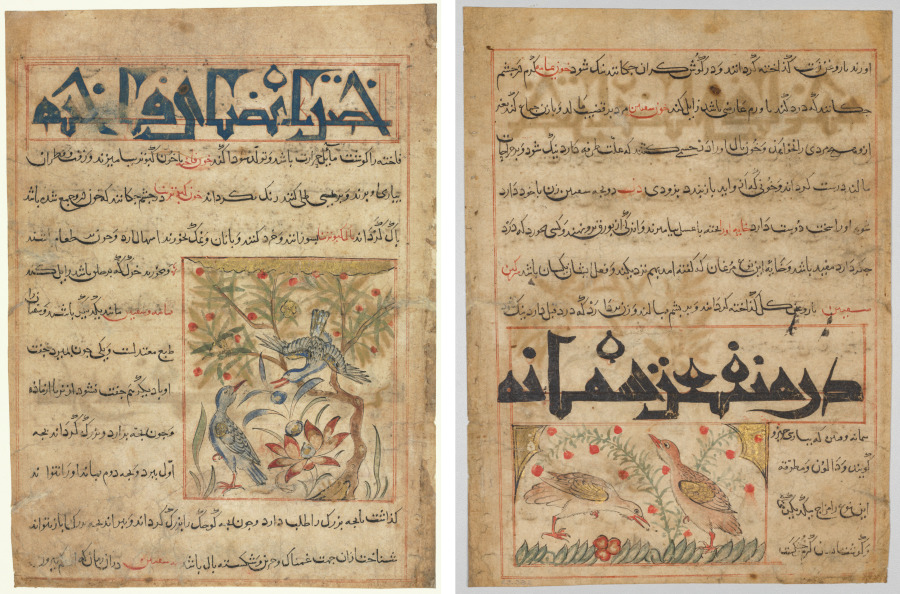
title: Qualities of Ringdoves (recto); On the Benefits of Quails (verso), from a Persian Manafi‘ al-Hayawan (The Benefits of Animals) of Abu Said Ubaid-Allah ibn Jibrail ibn Bakhtishu (died 1058–68)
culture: Iran, Maragah, Ilkhanid period (1256–1353)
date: c. 1300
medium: opaque watercolor, ink, and gold on paper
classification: Manuscript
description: This small illustration of ringdoves incorporates the influence of Chinese naturalism in the drawing of the tree trunk and lotus blossom. In contrast, the reverse side is more traditional. The innovative page layouts feature cursive nashki script with bold angular kufic script headings. Derived from Aristotelian sources, this treatise deals with the physical characteristics and organs of animals. The text was translated into Persian from Arabic for the Ilkhanid ruler Ghazan Khan (reigned 1295–1304). Roughly a dozen pages from this long-lost manuscript are known. It is dated by comparison with a similar manuscript made at Maragha, near Tabriz, in 1297 or 1299.